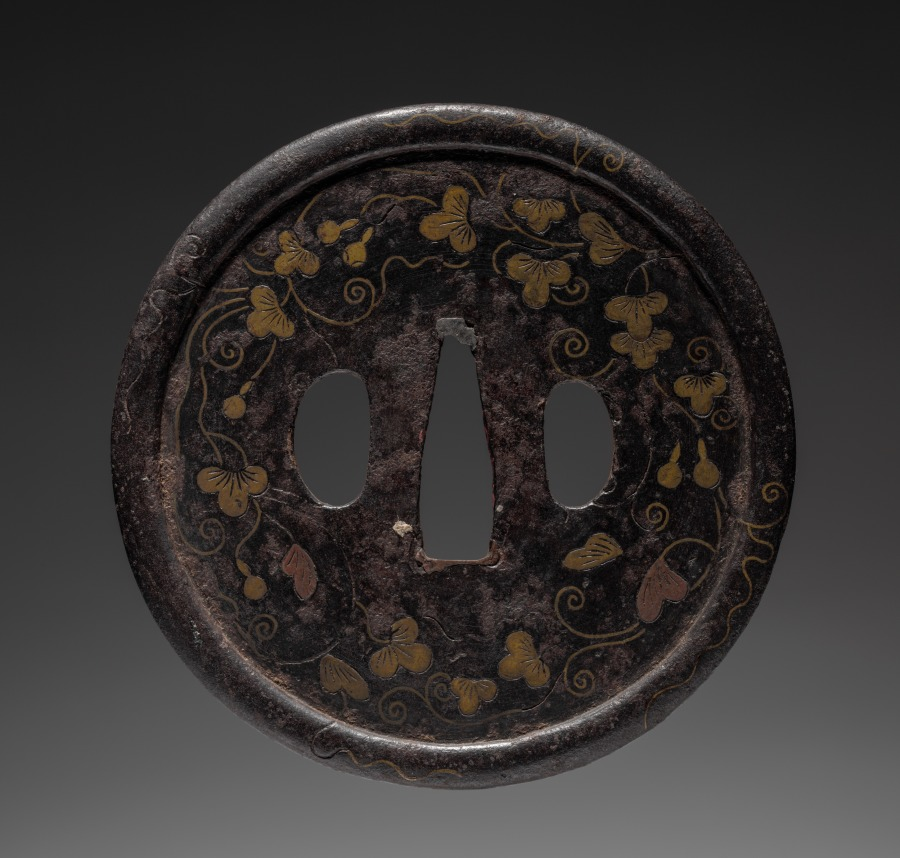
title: Sword Guard (Tsuba) with Gourds on Vine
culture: Japan, possibly Edo period (1615-1868)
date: c. 1615–1868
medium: iron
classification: Arms and Armor